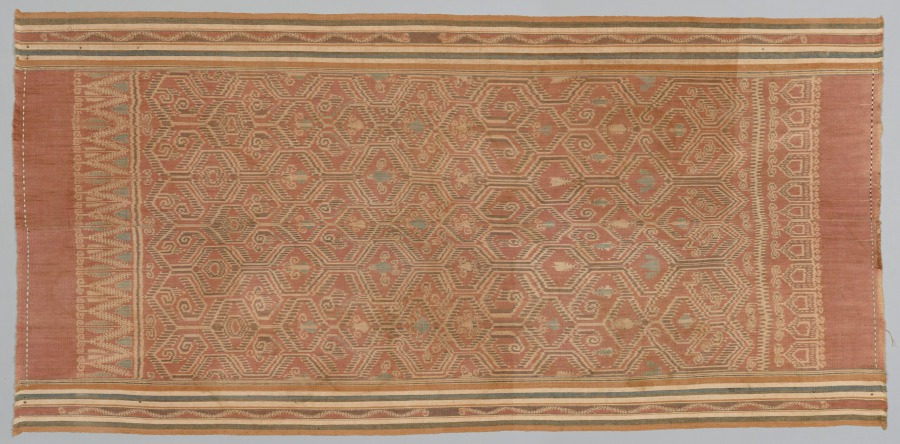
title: Pua (Ceremonial Blanket or Hanging)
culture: Borneo, Kalimantan, Iban Tribe, 20th century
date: 1900–1970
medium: tabby weave, warp ikat; cotton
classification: Textile